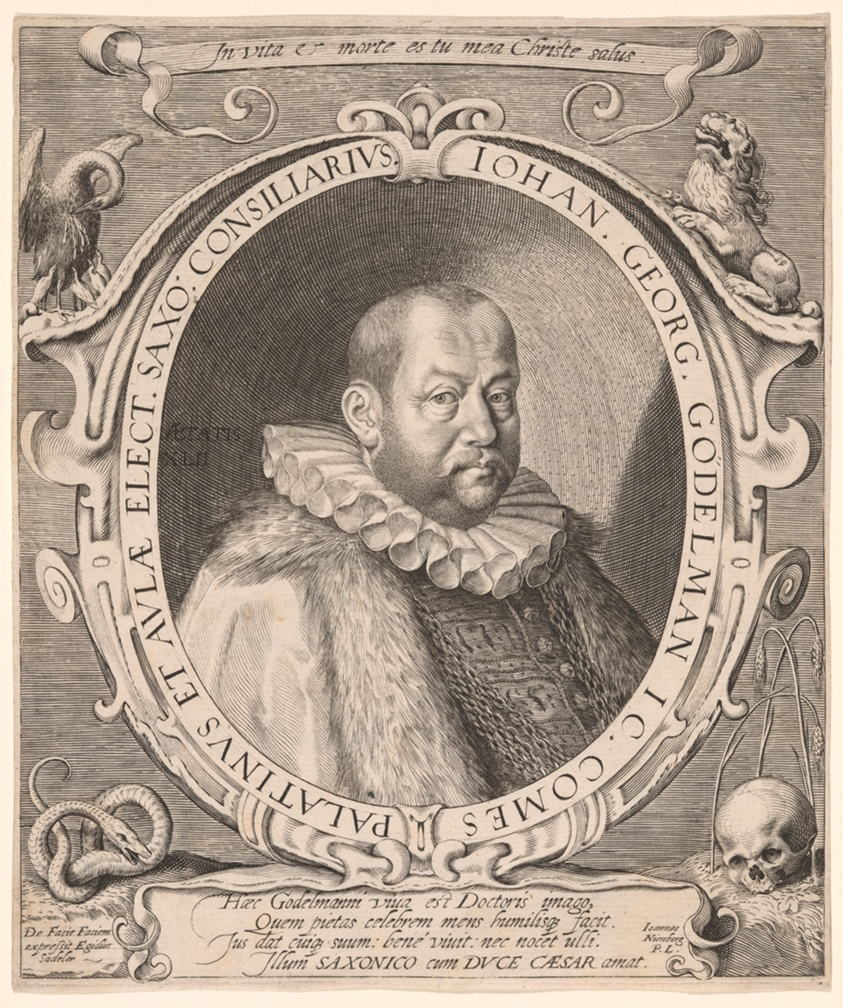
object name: Print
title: Johann Georg von Gödelmann, Law Professor, Diplomat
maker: Aegidius Sadeler II; Flemish, c. 1570–1629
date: c. 1601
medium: Engraving on paper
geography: Flanders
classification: engraving; paper; print; prints and drawing